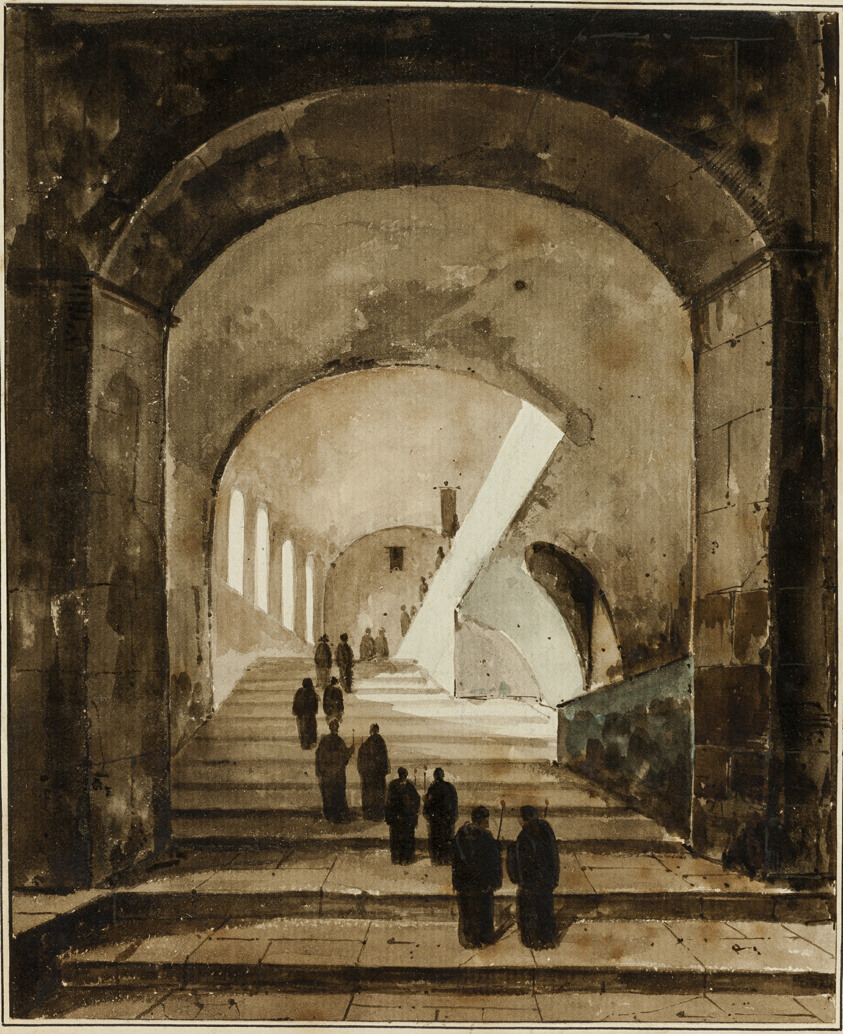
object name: Drawing and Watercolor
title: Monks on the Staircase of the Villa of Maecenas at Tivoli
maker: François-Marius Granet; French, 1775-1849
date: c. 1826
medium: Pen and brown ink and brush and brown wash, with touches of watercolor, over traces of graphite, on ivory laid paper, perimeter mounted on cream wove paper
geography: France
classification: pen and ink drawings; prints and drawing; paper